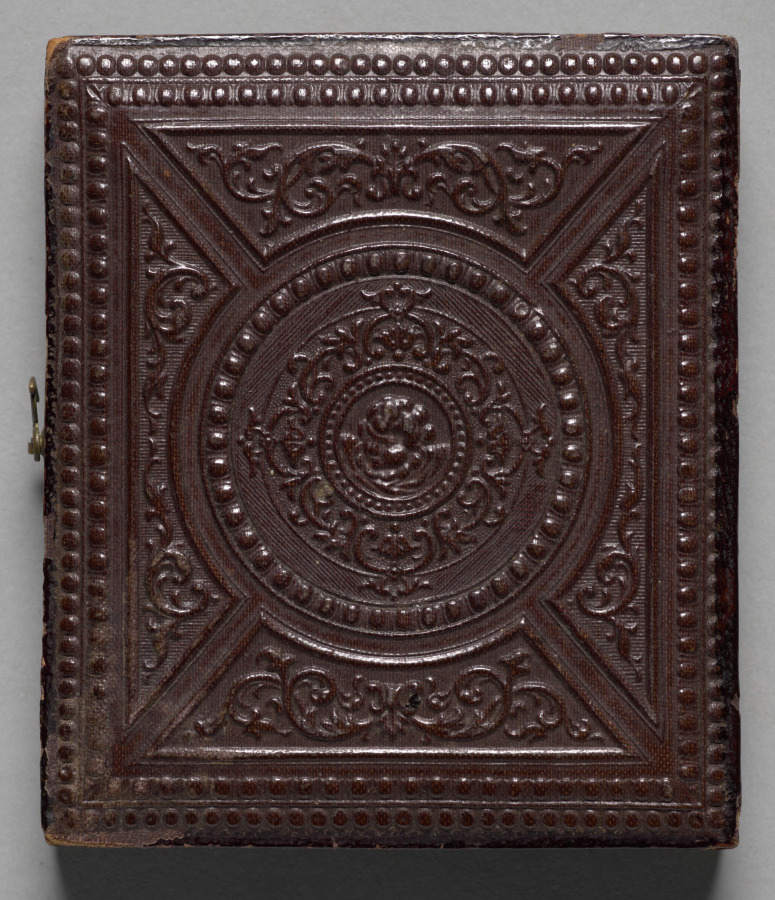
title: Teenage girl with bottle curls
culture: America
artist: Rufus Anson (American, 1820–1900)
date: c. 1855–60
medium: daguerreotype, sixth plate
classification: Photograph